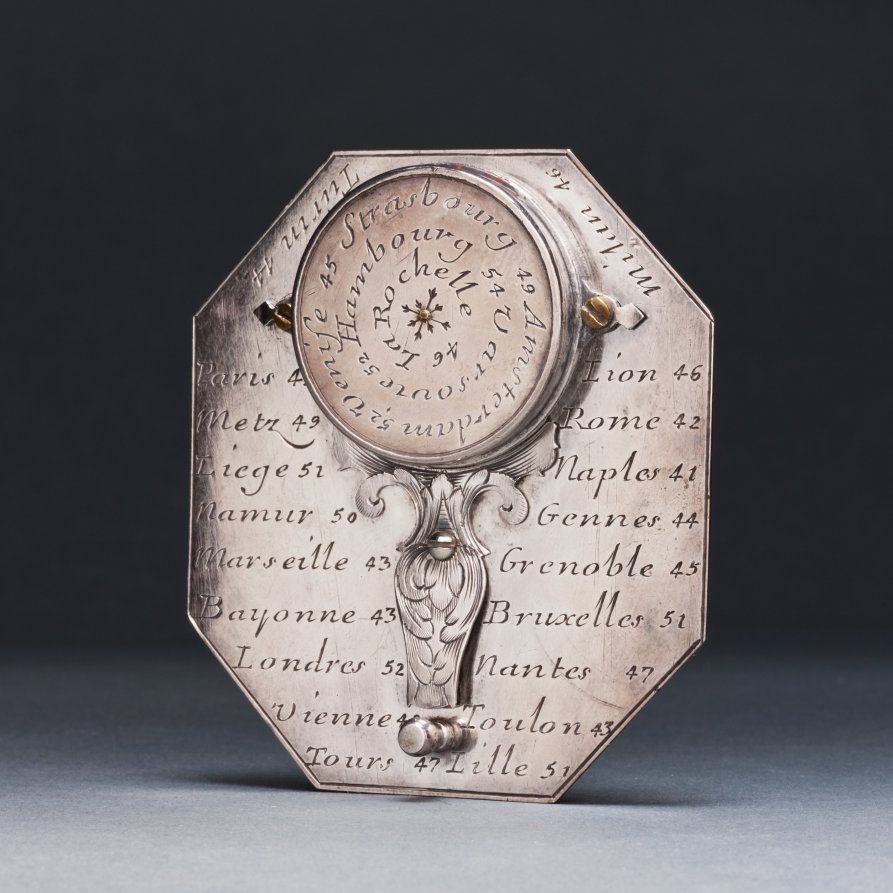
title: Butterfield Sundial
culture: France, 18th century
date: 1700s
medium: silver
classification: Silver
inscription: [Engraved signature above the compass in ribbon band]: "N. BION A Paris"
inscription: [Engraved on the face of the sundial]: “Pour 55° 4-5-6-7-8-9-10-11 50° IIII-V-VI-VII-VIII-IX-X-XI 45° 5-6-7-8-9-10-11 40° -VI-VII-VIII-IX-X-XI'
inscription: [Engraved on the other side]: "Pour 55° -8-7-6-5-4-3-2-1-0 50°-VIII-VII-VI-V-IIII-III-II-I 45°-8-7-6-5-4-3-2-1 40°-VII-VI-V-IIII-III-II-I"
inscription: [Engraved around the compass]: “NORD-OUEST-SUD-EST”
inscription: [Engraved on the back of the sundial]: “Turin 44 Milan 46 Paris 49 Lion 46 Metz 49 Rome 42 Liege 51 Naples 44 Namur 50 Gennes 44 Marseille 43 Grenoble 45 Bayonne 43 Bruxelle 51 Londres 52 Nantes 47 Vienne 48 Toulon 43 Tours 47 Lille 51”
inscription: [Engraved around the back of the compass]: “Venise 45 Strasbourg 49 Amsterdam 52 Hambourg 54 Varsovie 52 La Rochelle 46”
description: Butterfield-type sundials are characterized by their adjustable gnomons, metal flaps that cast a shadow on the dial’s face to indicate the hour, and geographical indices. This sundial has a scale adjustable between latitudes of 40° to 60° north. The latitudes of 26 European towns are engraved on its back for quick reference. With an intricately engraved silver face, it would have functioned as a fashionable traveler’s accessory.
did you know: Butterfield-style sundials were named after Micheal Butterfield, an English scientific and mathematical instrument maker who worked in Paris between 1674 and 1724.